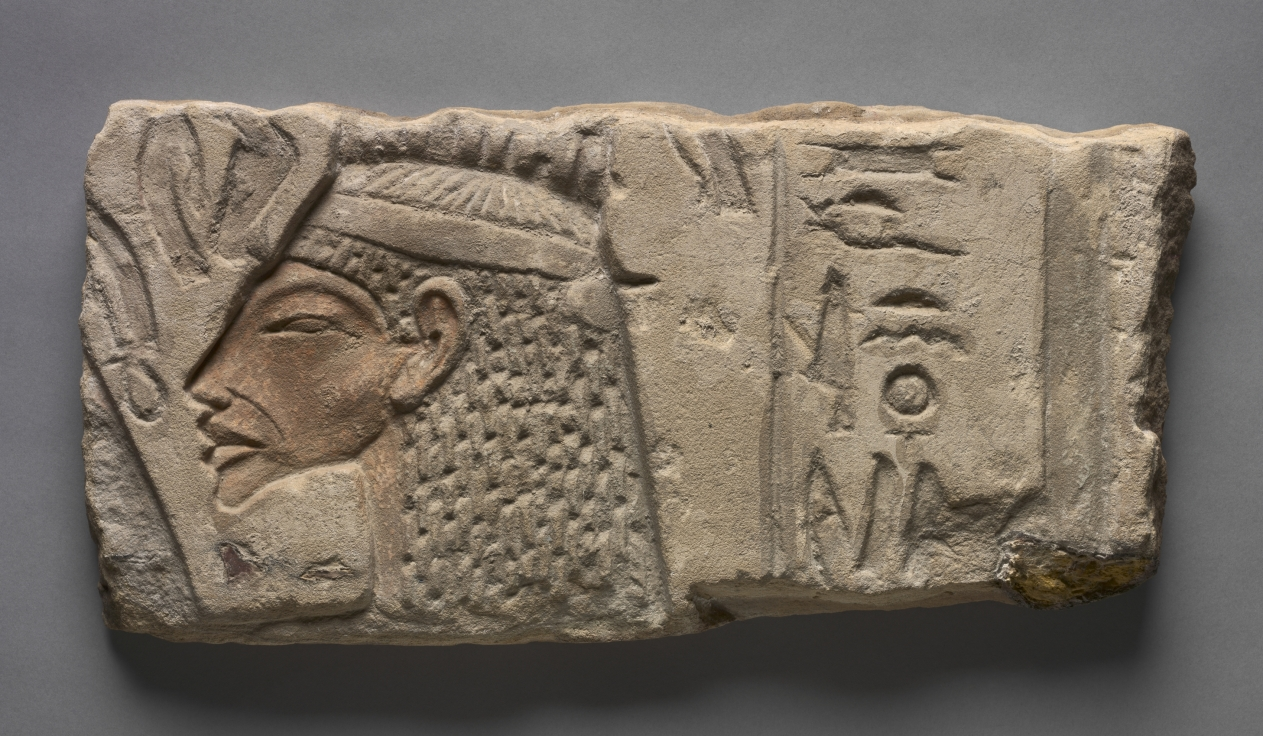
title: Talatat: Nefertiti Offers to the Aten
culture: Egypt, Karnak, New Kingdom (1540–1069 BCE), Dynasty 18, reign of Akhenaten (1351–1334 BCE)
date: 1353–1347 BCE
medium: painted sandstone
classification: Sculpture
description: The son of Amenhotep III, Akenaten, brought about the short-lived "monotheistic" revolution in Egyptian religion near the end of Dynasty 18. The young king constructed a temple complex to the Aten, the Sun Disk, at Karnak—where this relief originated—before he moved his capital to El Amarna. For reasons unknown, the figure of the Queen Nefertiti appears in these reliefs far more often than that of the king. Ironically, the Aten temples were dismantled to be used as foundations and fill for adaptations to the Great Temple of Amun, whom the Aten had briefly displaced.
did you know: Just in front of her nostril is the ankh or symbol of life, being given to her by Aten the sun, so that she may breathe in the god's gift of life.